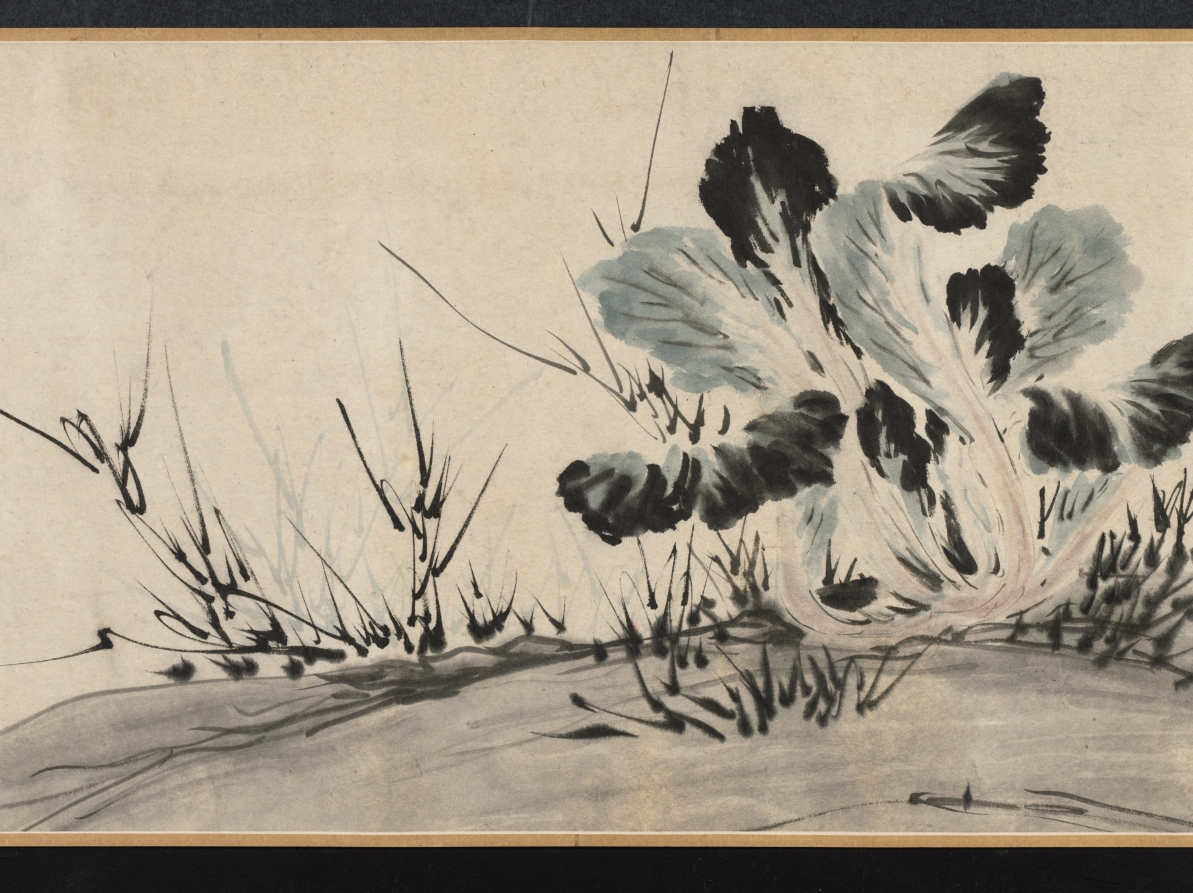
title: Chrysanthemums and Cabbage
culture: China, Ming dynasty (1368–1644)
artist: Tao Cheng (Chinese, active c. 1471–after 1502)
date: c. 1486 or before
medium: handscroll, ink and slight color on paper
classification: Painting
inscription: Artist's seal at beginning of painting: Yun hu 雲湖. Title by Wang Wenzhi 王文治 (1730–1802), date 1756. 2 seals of Wang Wenzhi 王文治 (1730-1802); 3 seals of Ku Yün (n. d.)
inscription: Section A (Chrysanthemums): 1 poem and 1 seal of Zhang Yuanzhen 張元禎 (1437–1507) - Jinshi, 1461; 1 poems and 3 seals of Ni Yue 倪岳 (1444–1501) - Jinshi, 1464; 1 poems and 2 seals of Zhao Xiang 趙祥 (life dates unknown) - Jinshi, 1469; 1 poems and 1 seals of Wu Xixian 吳希賢 (1437–1489) - Jinshi, 1464; 1 poems and 1 seals of Lü Chang 呂㦂 (1449–1511) - Juren, 1471; 1 poems and 3 seals of Fu Han 傅瀚 (1435–1502) - Jinshi, 1464; 1 poems and 1 seals of Feng Jue 馮珏 (life dates unknown) - Jinshi, 1478.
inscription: Chrysanthemums section, poem 1, by Zhang Yuanzhen 張元禎 (1437–1507): Several bushes of chrysanthemums grow in front of the Five-Willow Cottage,/ The yellow ones are really yellow and the white ones white./ This affable and decent fellow, young in years and unsophisticated,/ Has snapped one of the branches to dip in ink. (The Five-Willows Cottage was the home of the poet Tao Qian 陶潛 (Tao Yuanming 陶淵明, AD 365-427).) Chrysanthemums section, poem 2, by Ni Yue 倪岳 (1444–1501): Where at the Eastern Fence can you grieve for the Soul of the Xiang River?/ A man of upright character is mourned within the traces of ink./ White jade with a slight flaw would be a grievance forever,/ Later men should understand why even the roots of the flowers are washed. (Eastern Fence refers again to the poet Tao Qian 陶潛, while the Soul of the Hsiang River refers to the poet Qu Yuan 屈原 (c. 340–278 BC).) Chrysanthemums section, poem 3, by Zhao Xiang 趙祥 (life dates unknown): A clump of chrysanthemum grows in front of the bamboo pavilion,/ The winds of many autumns have blown since we parted beyond the river./ Straining wine through the official's cap of Tao [Qian] to prolong autumn's pleasures,/ The mists and clouds of ten thousand miles belong to the intoxicated. Chrysanthemums section, poem 4, by Wu Xixian 吳希賢 (1437–1489): It is a different spring if mulberry is planted during the latter part of the year,/ The dust of the world originally did not drop on clothing./ Who spills out ink under the Eastern Fence/ And paints so freely this portrait of chrysanthemums for the venerable Sir Tao? Chrysanthemums section, poem 5, by Lü Chang 呂㦂 (1449–1511): This full tray of ink for painting [flowers] at the Eastern Fence;/ Their whiteness or yellowness is not essential in capturing their beauty./ I don't have to go to Jiangnan to see them myself./ At my old house grow two or three branches. Chrysanthemums section, poem 6, by Fu Han 傅瀚 (1435–1502): Who daubed autumn flowers with ink/ As if they were dark dew on a branch tip only vaguely seen at evening?/ After the lazy clouds disperse, no one paints;/ A certain unconventionality pervades this painting. Chrysanthemums section, poem 7, by Feng Jue 馮珏 (life dates unknown): To satisfy his hunger, [the chrysanthemums] have at times entered the poetry of Qu Yuan;/ Taking up the wine cup, it felt close to Tao Qian./ [With them I am like] a lonely root sustained by deep water/ Or an old man to whose hair the color of youth returns.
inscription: Section B (Cabbage): 1 poem and 1 seal of Cai Qi 蔡圻 (life dates unknown) - degree information not known; 1 poems and 3 seals of Ni Yue 倪岳 (1444–1501) - Jinshi, 1464; 1 poem and 3 seals of Jiao Fang 焦芳 (1436–1517) - Jinshi, 1464; 1 poem and 3 seals of Li Dongyang 李東陽 (1447–1516) - Jinshi, 1464; 1 poems and 1 seals of Wu Xixian, signed “Xixian” 吳希賢 - Jinshi, 1464; 1 poems and 3 seals of Fu Han 傅瀚 (1435–1502) - Jinshi, 1464; 1 poems and 1 seals of Lü Chang 呂㦂 (1449–1511) - Juren, 1471; 1 poems and 2 seals of Zhao Xiang 趙祥 (life dates unknown) - Jinshi, 1469; 1 poems and 1 seals of Feng Jue 馮珏 (life dates unknown) - Jinshi, 1478.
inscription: Cabbage section, poem 1, by Cai Qi 蔡圻 (life dates unknown): The ink splashes are fresh from a frosty brush dipped in pond water;/ I can visualize that time when Yunhu 雲湖 [Tao Cheng] first showed his talents./ I lament the places where I scribbled before,/ Who would open them to inscribe a poem? (The first line is an allusion to the famous Jin dynasty calligrapher Wang Xizhi 王羲之 (AD 303-361), who practiced calligraphy so diligently at the edge of a pond that the water turned black with ink.) Cabbage section, poem 2, by Ni Yue 倪岳 (1444–1501): After rain the vegetables begin to grow;/ How are the colors of the masses lately!/ Once you get used to them, the tastiest parts are the ends of the roots;/ I don't know if they can be used for "seasoning soup." ("Seasoning soup" is an allusion to the statesmanship of a chief minister.) Cabbage section, poem 3, by Jiao Fang 焦芳 (1436–1517): This crop of purple stalks and green leaves is late and irregular;/ Now the rainy season is over for the Eastern Garden./ All the nobles nowadays dine on meat;/ Who of them knows the flavor of this [cabbage]. Cabbage section, poem 4, by Li Dongyang 李東陽 (1447–1516): It's always helped the honest man to sober up after drinks./ I intend to go to the deepest part of the stream-crossed garden/ To refresh myself in the fragrance and dew of evening. Cabbage section, poem 5, by Wu Xixian 吳希賢 (1437–1489): After rain, the white silk is filled with fragrant vegetables;/ How many times this happens in Mr. Tao's paintings./ On whom will you depend to present a memorial to the ruler?/ Don't let this color emerge on the faces of the people. (The last line is meant as a warning to officials: the color of the vegetables (green) may be pleasing in itself, but when it emerges on the faces of the starving poor, it signifies a badly governed world.) Cabbage section, poem 6, by Fu Han 傅瀚 (1435–1502): For twenty years I have feasted on the excellent mutton of an official;/ Yet I talk and dream about the garden and its vegetables./ Do not merely say it is good to chew the root of the cabbage--/ You must taste to understand what poverty is. Cabbage section, poem 7, by Lu Chang 呂㦂 (1449–1511): The capital is never a place for an apprentice in the "garden of scholarship."/ Who would write about gardens and vegetables on an examination paper?/ I've walked throughout the country in spring;/ Make sure the people don't show this color. Cabbage section, poem 8, by Zhao Xiang 趙祥 (life dates unknown): After a wash of rain, the spring garden is still in order;/ The flavor [of the cabbage] is more suitable with a small drink and the hum of a tune./ The rich and powerful in their mansions consume dish after dish of meat;/ Vegetarian food is known only by the scholars. Cabbage section, poem 9, by Feng Jue 馮珏 (life dates unknown): A new cabbage is nourished with dew;/ It takes a long time to grow and mature./ The business of "seasoning the soup" is your responsibility;/ Better command the gardener to take care [of the cabbages]. trans. HK/LYSL/WKH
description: On an autumn day in Beijing, Tao Cheng had a gathering with a group of scholar-officials and created two paintings in a spontaneous, casual style. The first depicts chrysanthemums, slender bamboo stalks, and a rock in monochrome ink. Tao applied light colors for the second painting that depicts cabbage. Tao deliberately placed the images on the first sections of the paper so that his honorable guests could add their poetic inscriptions inspired by his imagery. In the first section to the right, all seven poetic inscriptions refer to the beloved poet and recluse Tao Qian (also called Tao Yuanming, AD 365–427) who was particularly known for his profound love for chrysanthemum flowers. Most of the inscriptions in the second section express sympathy for the poor, since cabbage is the main ingredient in their humble food. Taken together, the poems and paintings allude to the life and responsibilities of the scholar-official: the importance of both an upright character and a concern for the poor citizens in order to achieve good government.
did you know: Eminent calligrapher Wang Wenzhi 王文治 was only 27 sui when he wrote the title in 1756.